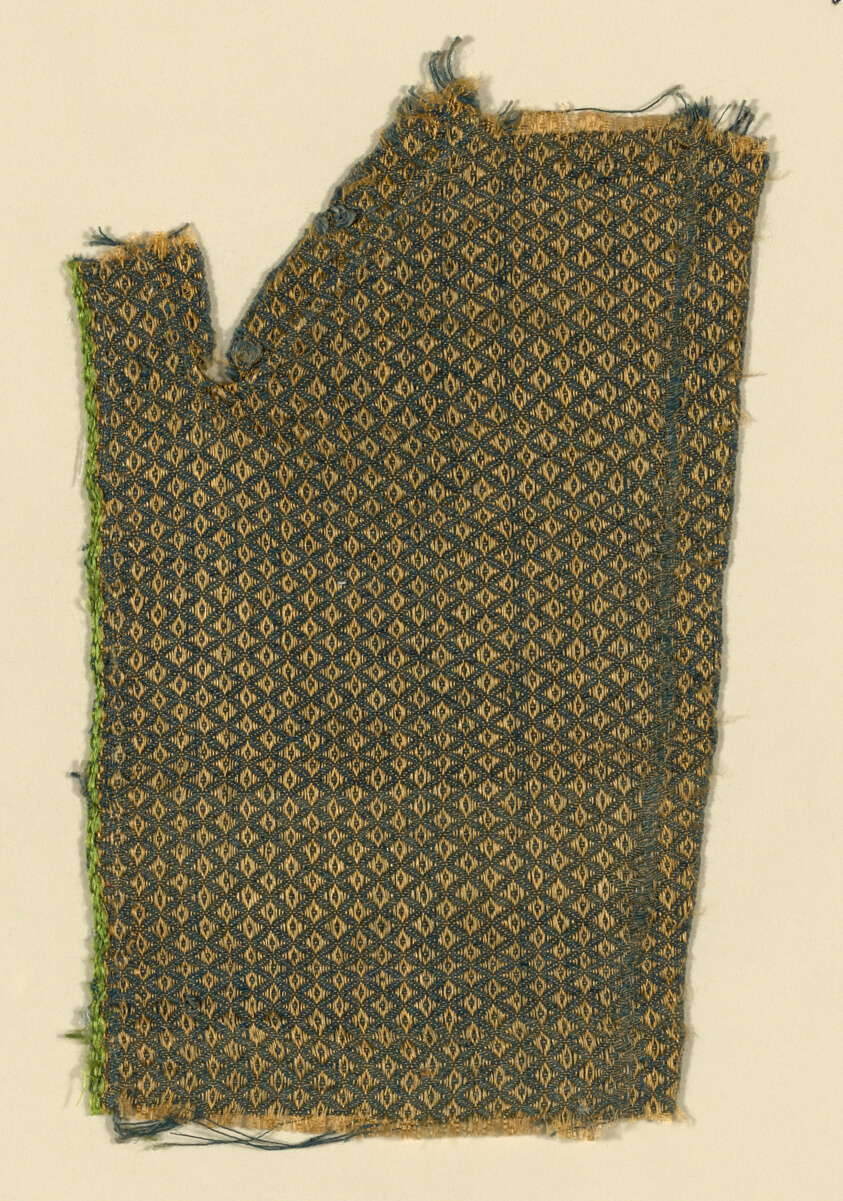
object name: Textile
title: Fragment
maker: Europe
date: 16th/17th century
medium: silk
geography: Europe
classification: textile; weaving